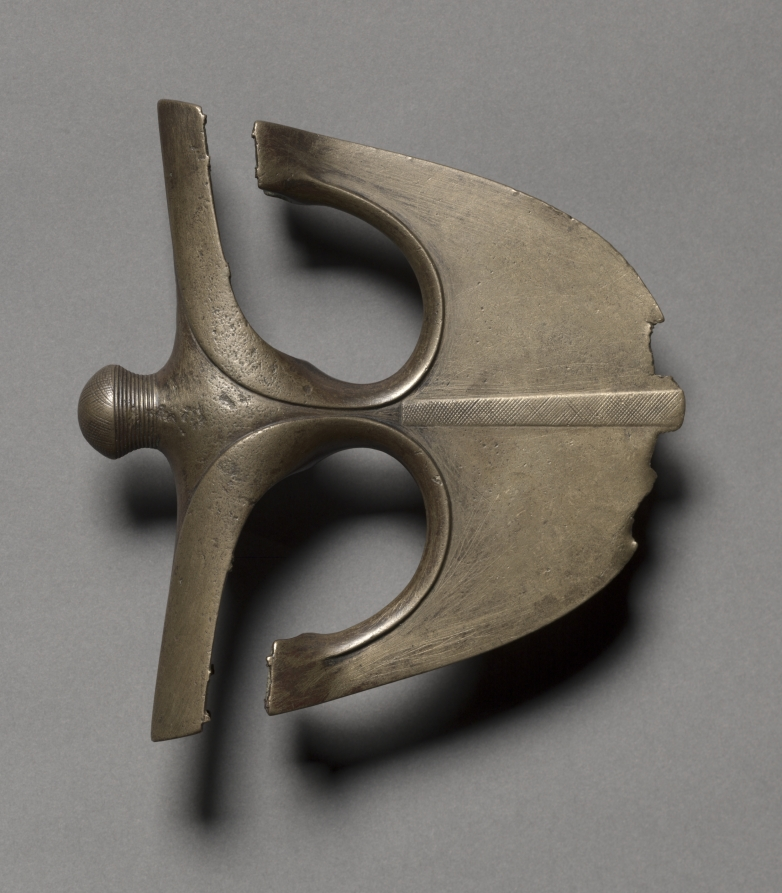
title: Duck-Billed Axe Head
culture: Egypt, New Kingdom (1540–1069 BCE), Dynasty 18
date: 1540–1296 BCE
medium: bronze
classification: Implements